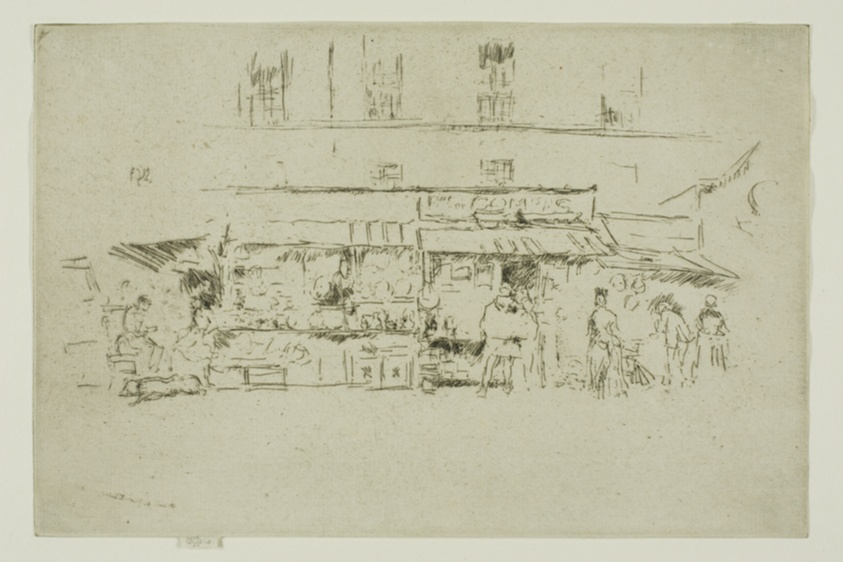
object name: Print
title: Quai de Montebello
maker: James McNeill Whistler (American, 1834-1903)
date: 1888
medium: Etching with foul biting in black ink on buff laid paper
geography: United States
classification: etching; foul biting; print; prints and drawing; paper